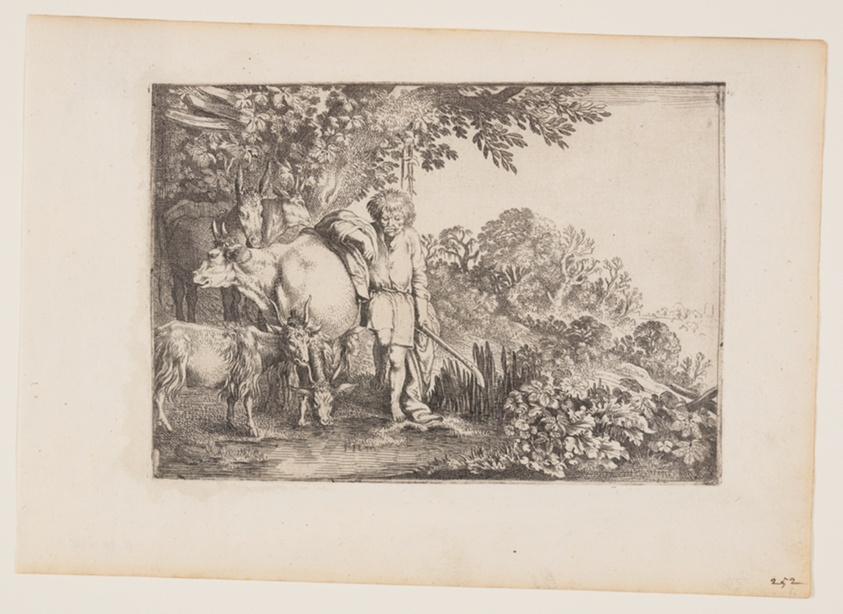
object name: Print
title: Argus Attending his Herd, plate 2 from The Story of Mercury and Argus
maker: Moses van Uyttenbroeck (Dutch, c. 1595–before 1647)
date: c. 1620-26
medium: Etching on ivory laid paper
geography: Netherlands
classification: etching; paper; print; prints and drawing